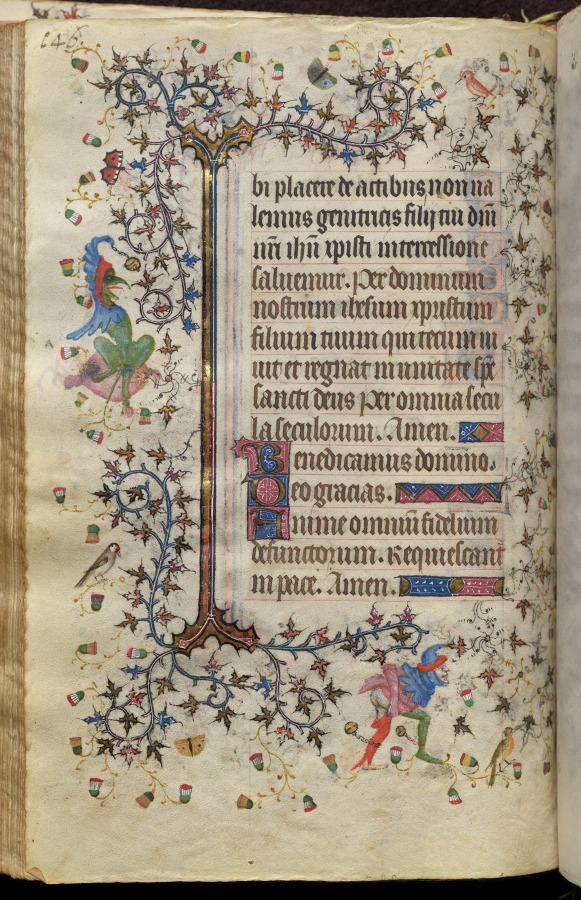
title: Hours of Charles the Noble, King of Navarre (1361-1425): fol. 73v, Text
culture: France, Paris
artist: Master of the Brussels Initials and Associates (French)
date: c. 1405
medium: ink, tempera, and gold on vellum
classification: Bound Volume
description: This precious volume was obviously highly prized by its owner, the French-born King of Navarre, who had his coat of arms painted on no less than twenty folios. Rather than directly commissioning this manuscript from a specific workshop, it seems that Charles the Noble acquired his book of hours -- perhaps ready-made for the luxury market -- while on a trip to Paris in 1404-05. A collaborative effort, six painting styles are evidenced within the pages of this codex, those of two Italians, two Frenchmen, and two Netherlanders. The painter who was responsible for the planning and decoration of the book, and who produced seventeen of the large miniatures, was a Bolognese artist known as the Master of the Brussels Initials. His principal assistant, responsible for most of the borders, was a Florentine who signed his name "Zecho" da Firenze on folio 208 verso.